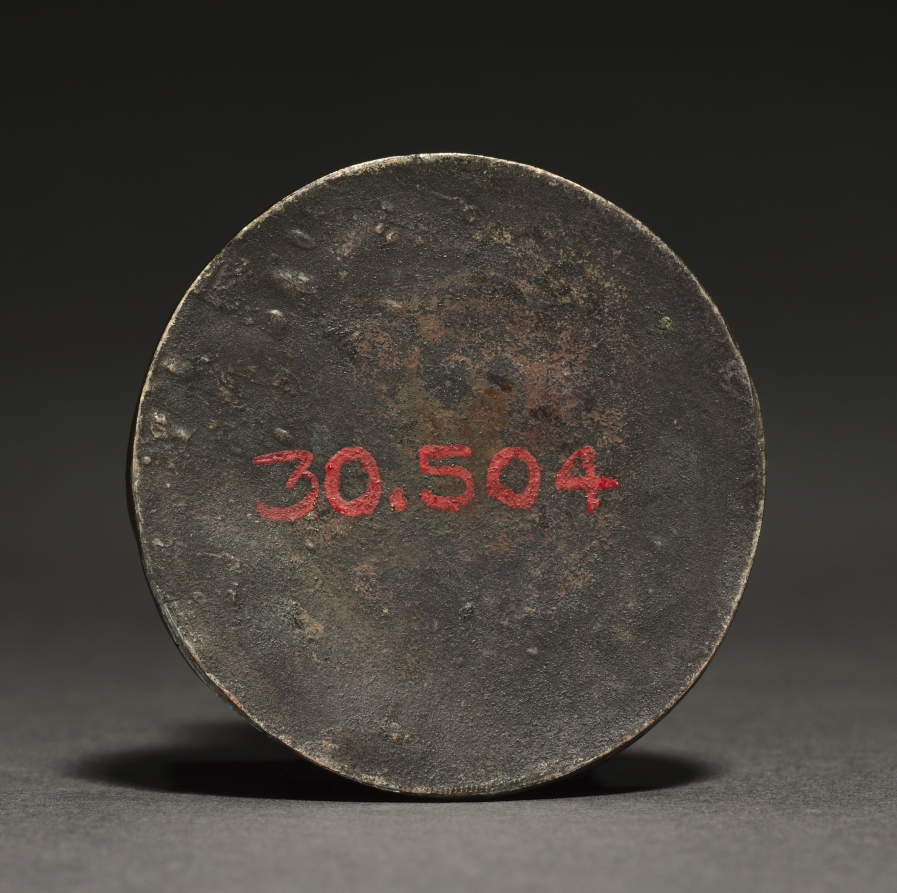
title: Medallion with the Bust of Christ ("The Cumberland Medallion"), from the Guelph Treasure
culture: Germany, Weserraum, Migration period, late 8th century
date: late 700s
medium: cloisonné enamel and gold on copper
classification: Enamel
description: This medallion may have originally served as a sacerdotal brooch and is the earliest object from the Guelph Treasure, the ecclesiastical treasure of Germany’s Braunschweig (Brunswick) Cathedral.